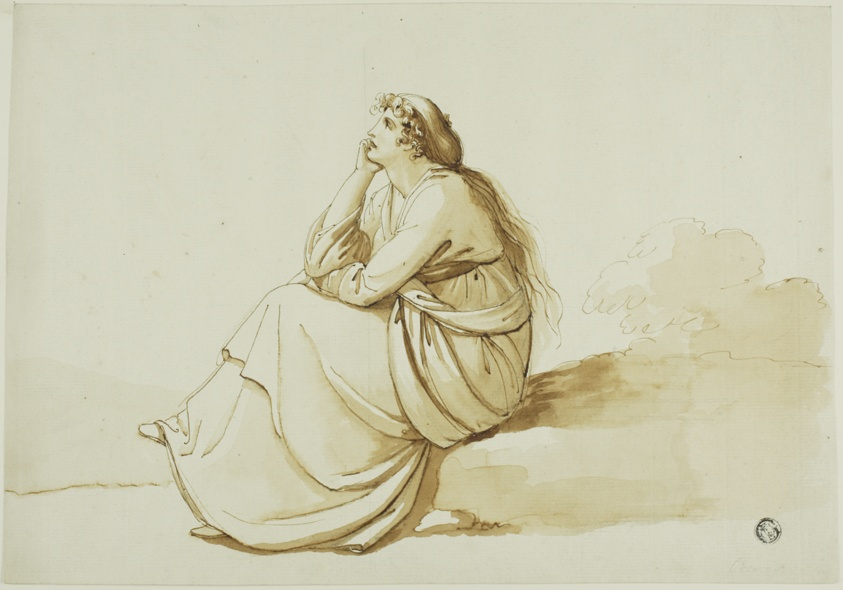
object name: Drawing and Watercolor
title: Seated Woman in Profile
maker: Richard Cosway, R.A. (English, 1742-1821); or Henry Tresham (Irish, 1751-1814); or Conrad Martin Metz (English, born Germany, 1749-1827)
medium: Pen and brown ink with brush and brown wash, over graphite, on ivory laid paper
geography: England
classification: pen and ink drawings; drawings (visual works); prints and drawing